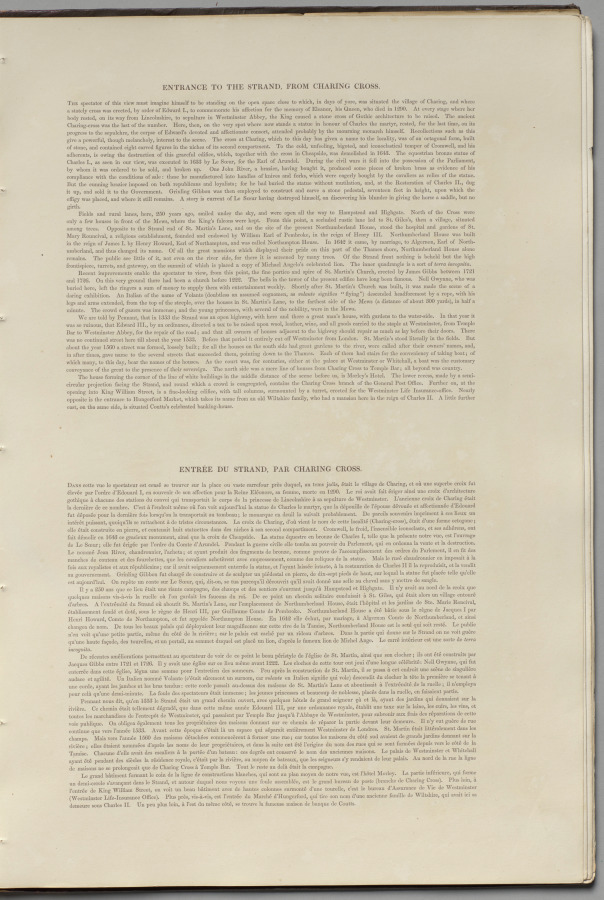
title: London As It Is: Entrance to the Strand, from Charing Cross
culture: England, 19th century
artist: Thomas Shotter Boys (British, 1803–1874)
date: 1841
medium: lithograph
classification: Bound Volume